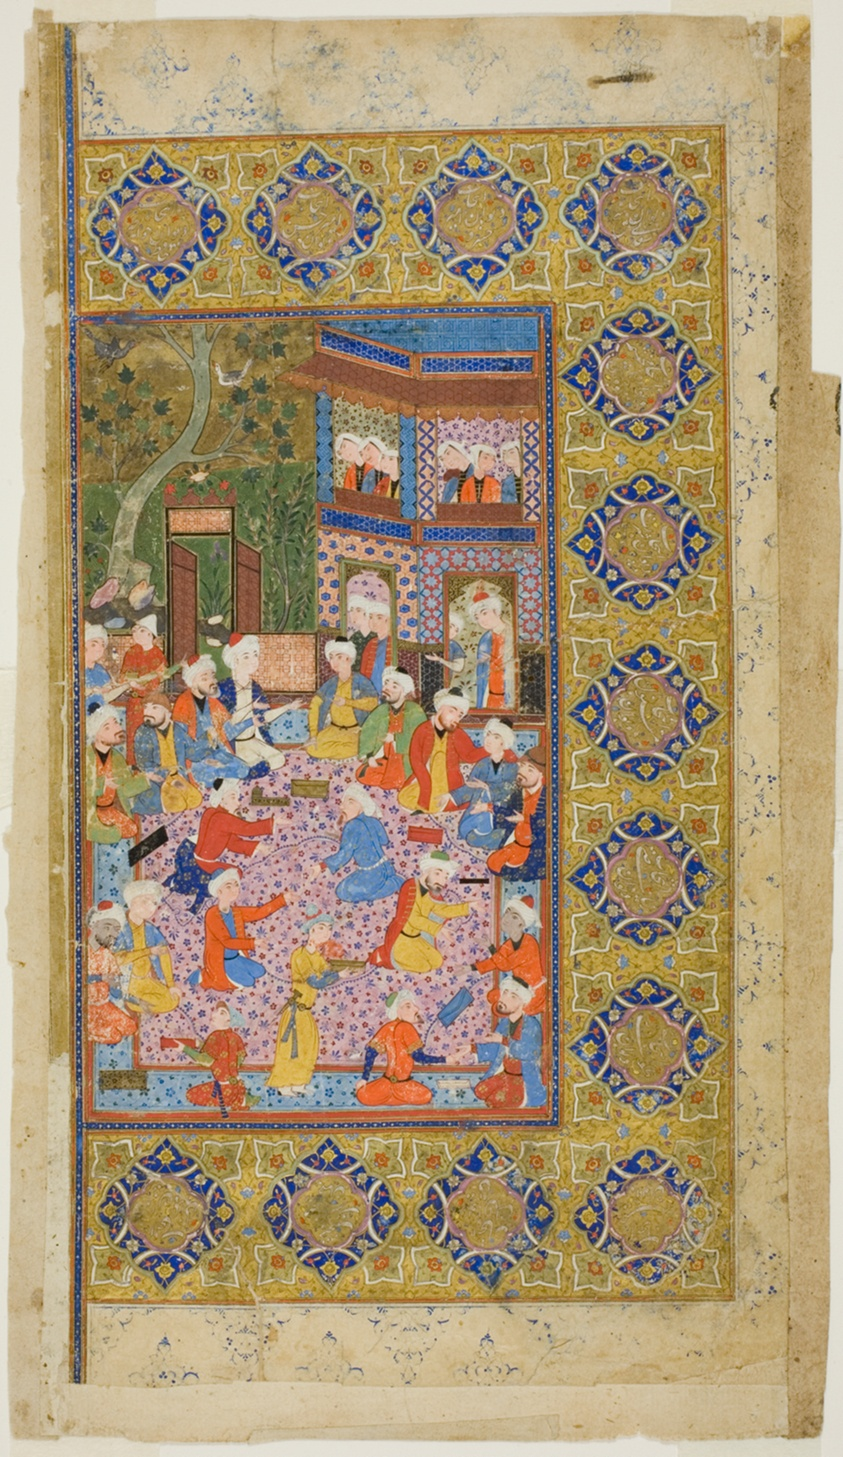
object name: Painting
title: Courtyard of a Palace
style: Islamic (culture or style)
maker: Iran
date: Safavid dynasty (1501–1722), 16th century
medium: Opaque watercolor and ink on paper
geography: Iran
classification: miniature painting; manuscript; asian art; painting